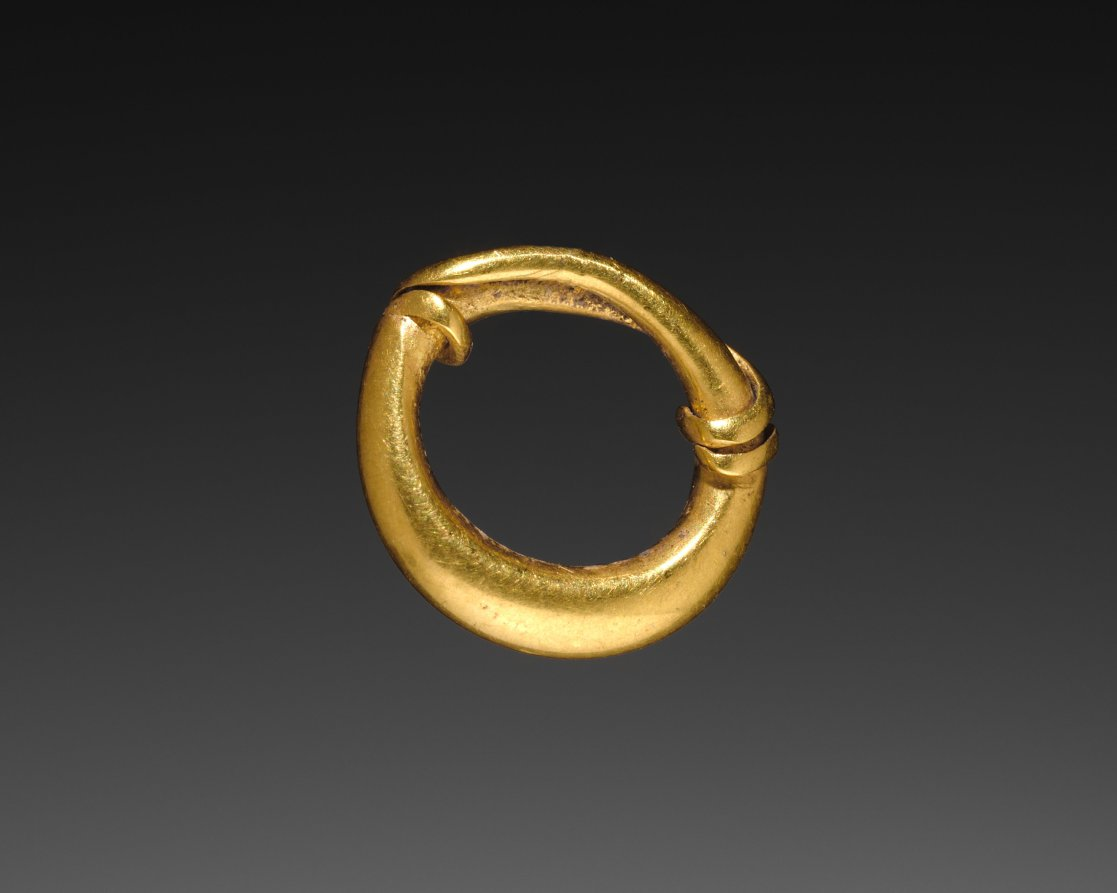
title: Ring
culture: Parthian Empire (247 BCE–224 CE)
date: 1–200 CE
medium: gold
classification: Jewelry